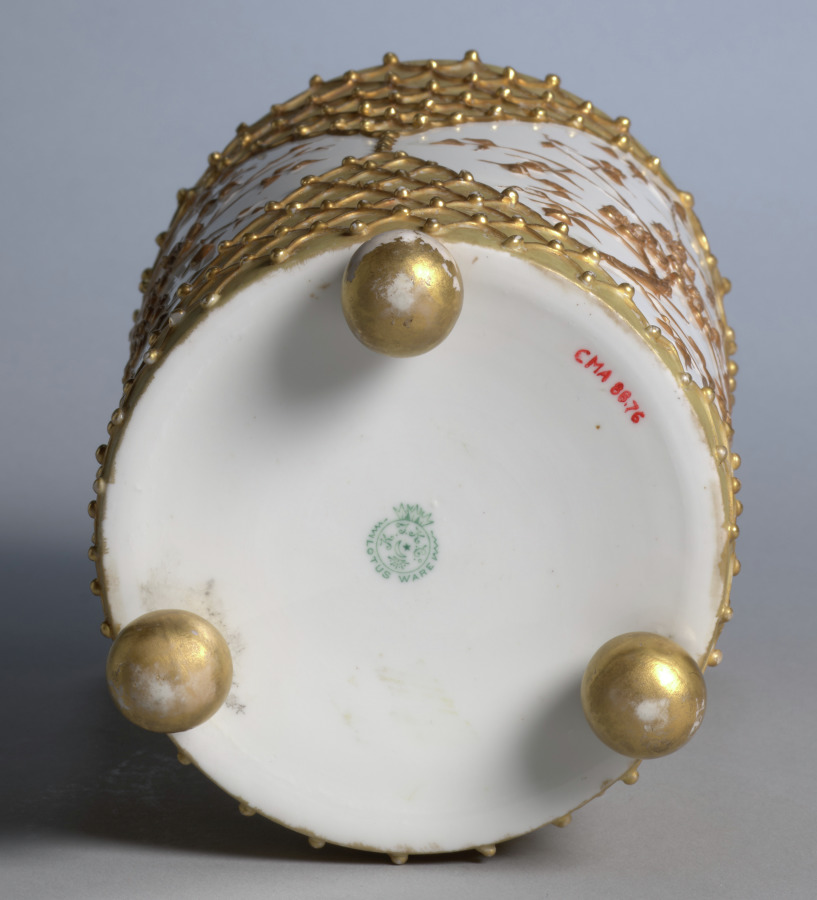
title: Vase (Lotus Ware)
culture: America, Ohio, East Liverpool, 19th century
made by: Knowles, Taylor and Knowles Company (American)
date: c. 1895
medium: porcelain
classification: Ceramic